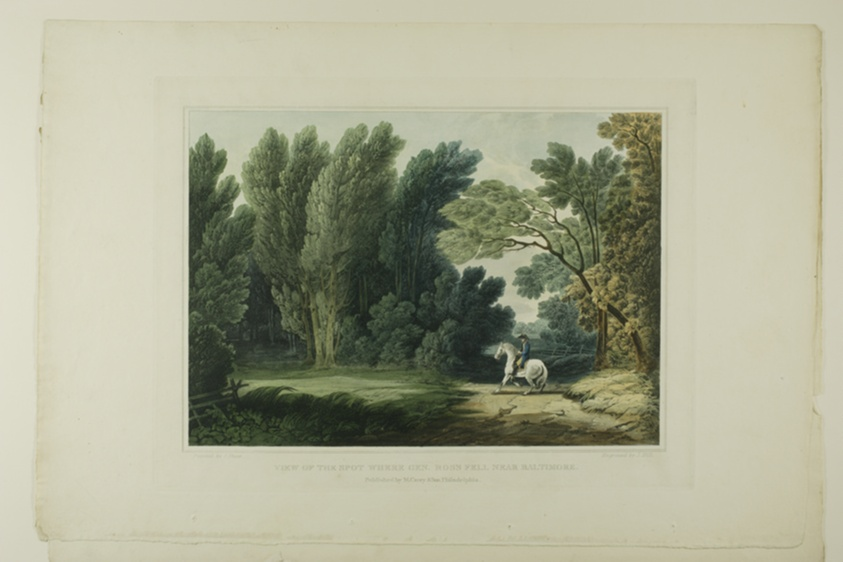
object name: Print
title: View of the Spot Where General Ross Fell, Near Baltimore, plate six of the first number of Picturesque Views of American Scenery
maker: John Hill (American, 1770-1850); after Joshua Shaw (American, born England, c. 1777-1860); published by Matthew Carey & Son (American, active 1795-1821)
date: 1819/21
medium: Aquatint with etching and hand-coloring on cream wove paper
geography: United States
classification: aquatint; prints and drawing; print; portfolio